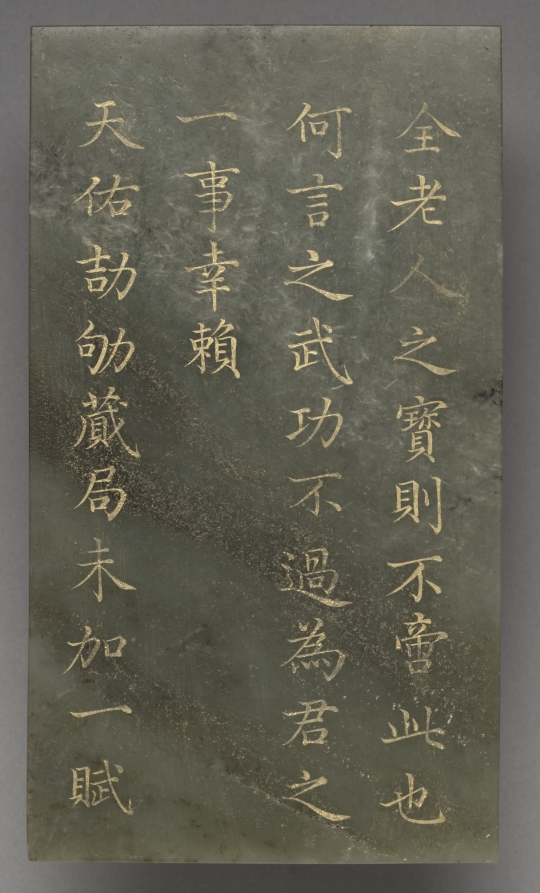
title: Tablet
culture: China, Qing dynasty (1644–1911), Qianlong reign (1736–95)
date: 1778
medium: jade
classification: Jade